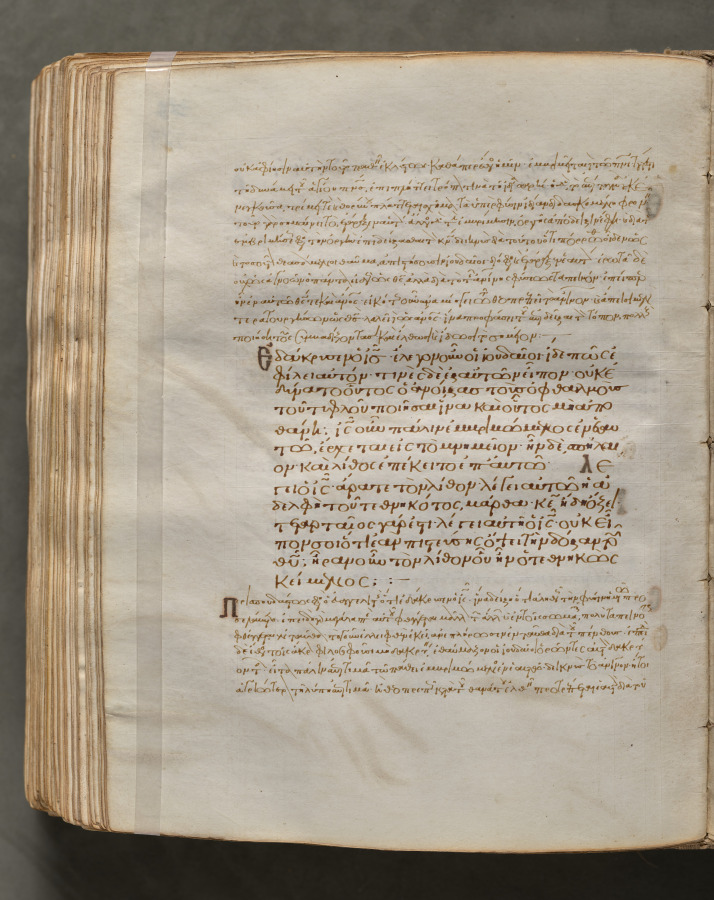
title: Text, folio 379 (verso), from a Gospel Book with Commentaries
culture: Byzantium, Constantinople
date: c. 1000–1100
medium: ink, tempera, and gold on vellum; leather binding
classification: Bound Volume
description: Each of the four gospels in this book opens on a page with brilliantly illuminated borders depicting the author of the text as well as birds—principally peacocks, symbols of the immortality of the soul—and fountains, representing the fountain of life and the salvation of the soul. This volume consists of 428 leaves with texts in Greek. Its level of sophistication suggests that it was probably written and decorated in a monastery in Constantinople.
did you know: Gospel books were carried in procession through Byzantine churches.